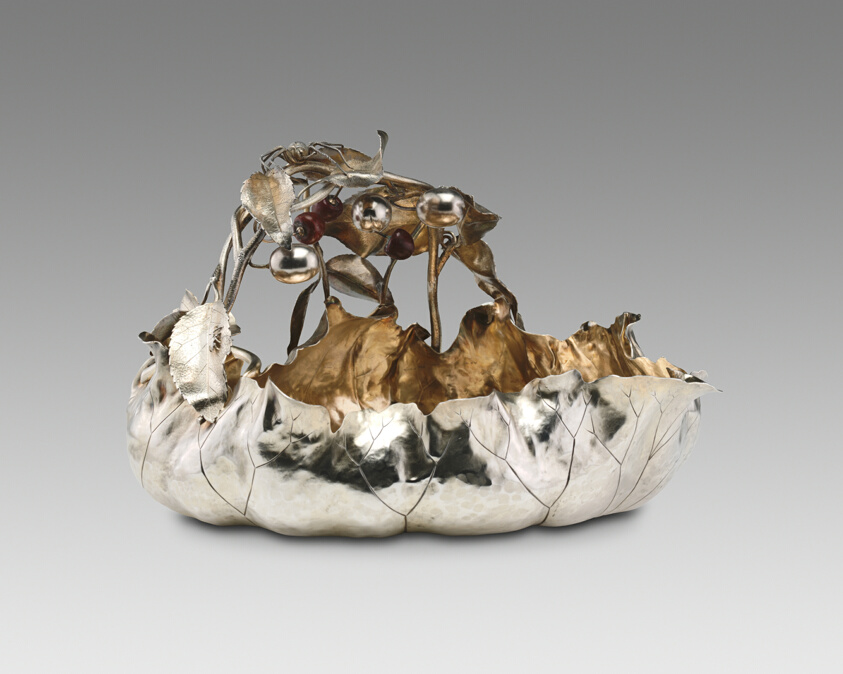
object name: Metalwork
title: Berry Bowl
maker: Design attributed to George W. Shiebler (American, 1846–1920); Produced by George W. Shiebler (1876–91); or produced by George W. Shiebler and Company (1892–1910); New York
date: 1885–95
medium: Silver, parcel-gilt silver, and copper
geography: New York City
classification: bowl; vessel; decorative arts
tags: cherries, berries, insects, spiders, leaves, dining, drinking